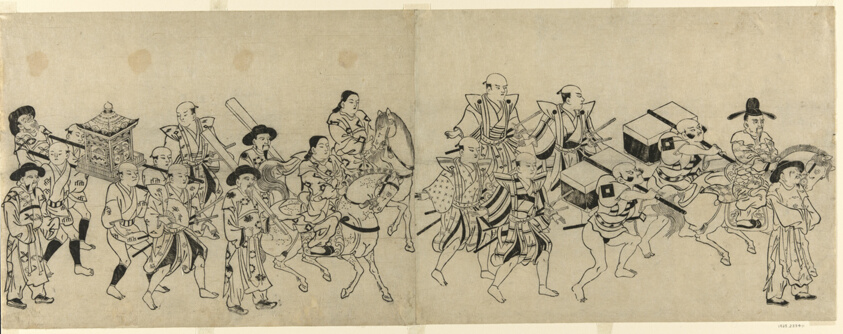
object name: Print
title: Arrival of the Korean Embassy in Edo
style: Japanese (culture or style)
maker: Torii Kiyonobu I (Japanese, 1664-1729)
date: c. 1709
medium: Woodblock print; oban sumizuri-e, 1 of 6 sheets from a 12-sheet composition (see 1925.2334a-f)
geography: Japan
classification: woodblock print; print; asian art; woodblock